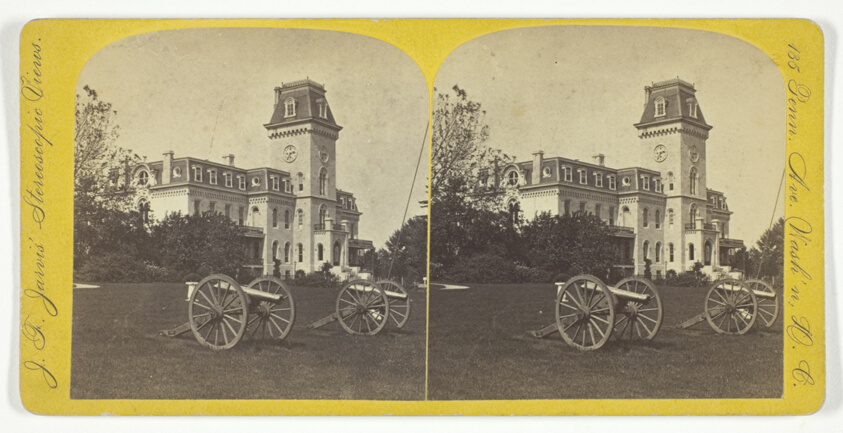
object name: Photograph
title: Soldiers' Home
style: 19th century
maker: J. F. Jarvis (American, 1850-1931)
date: 1875/99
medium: Albumen print, stereo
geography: District of Columbia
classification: photography; photograph; albumen silver print; stereograph (albumen)